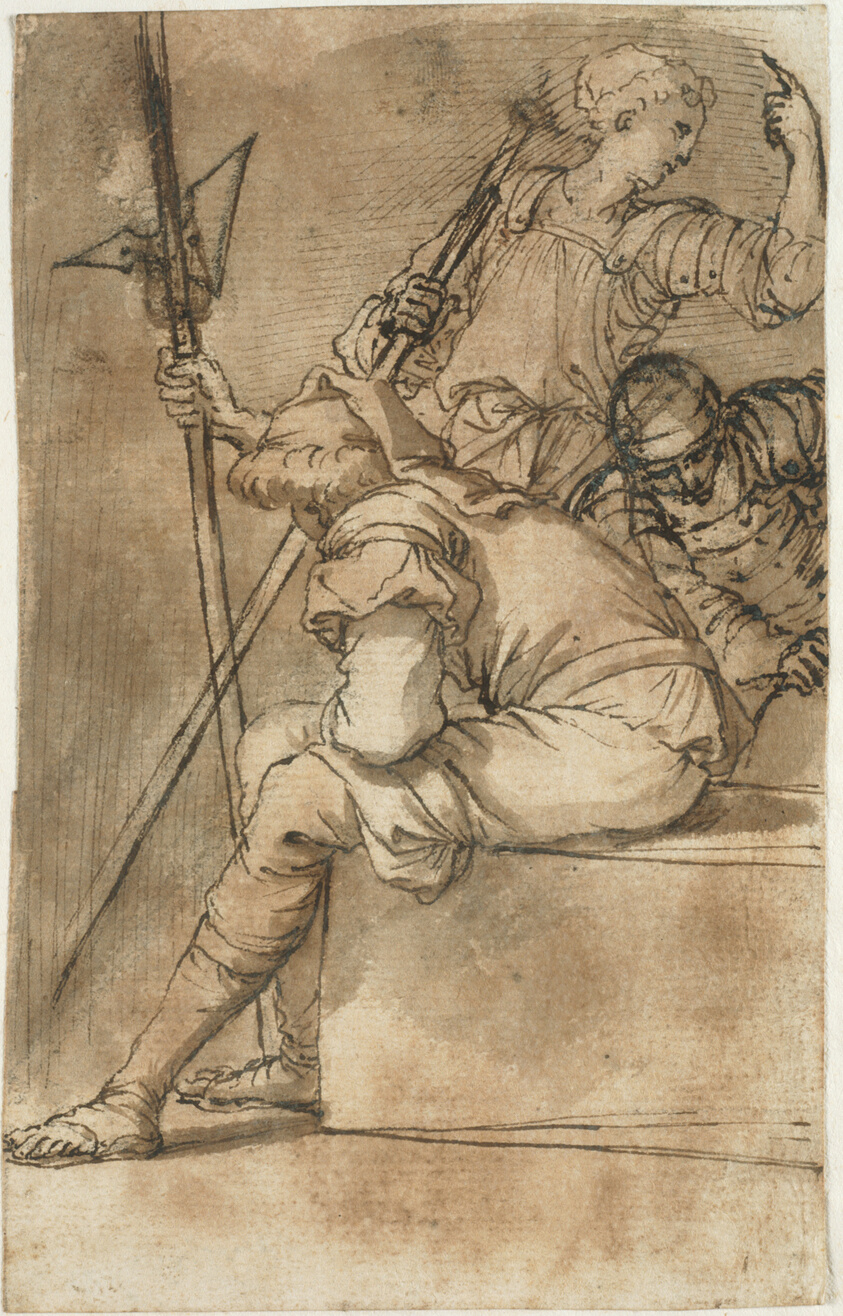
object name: Drawing and Watercolor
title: Three Soldiers Resting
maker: Salvator Rosa (Italian, 1615-1673)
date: 1656/57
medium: Pen and brown ink with brush and brown and gray washes, over black chalk, on cream laid paper, laid down on off-white laid paper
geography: Italy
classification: pen and ink drawings; drawings (visual works); prints and drawing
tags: soldiers, people, prints and drawings